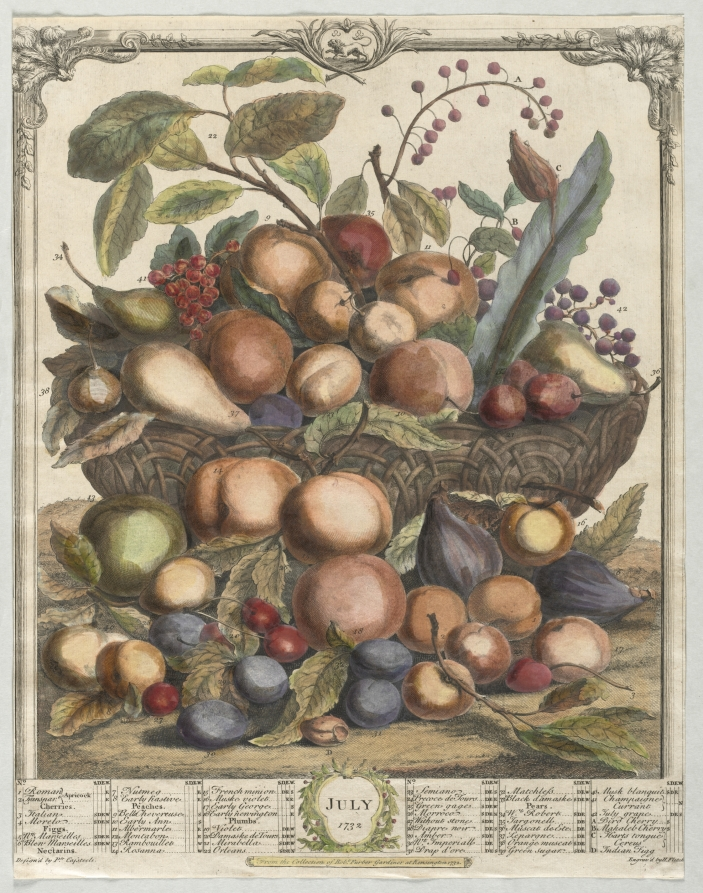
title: Twelve Months of Fruit: July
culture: England, 18th century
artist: Henry Fletcher (British, active 1715–38)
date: 1732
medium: engraving, hand-colored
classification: Print